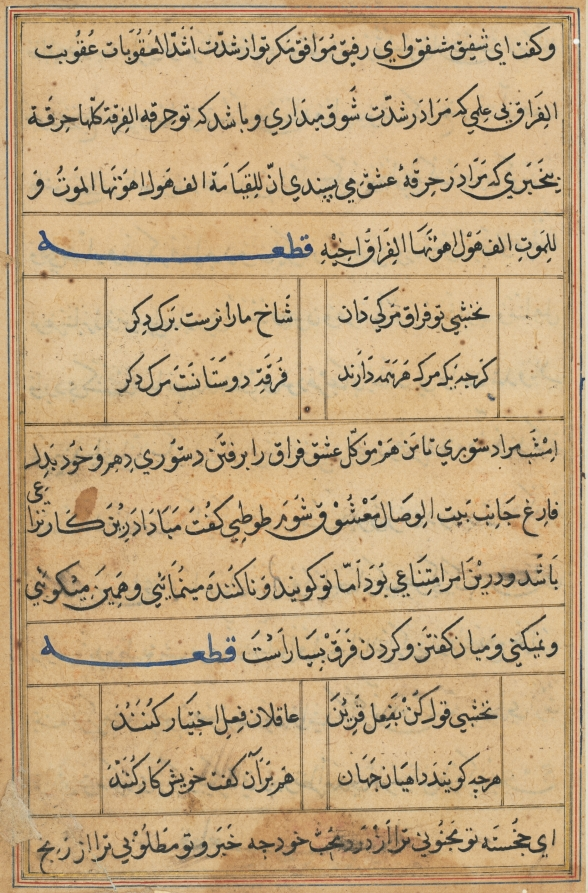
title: Page from Tales of a Parrot (Tuti-nama): text page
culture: Mughal India, court of Akbar (reigned 1556–1605)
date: c. 1560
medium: gum tempera, ink, and gold on paper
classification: Painting